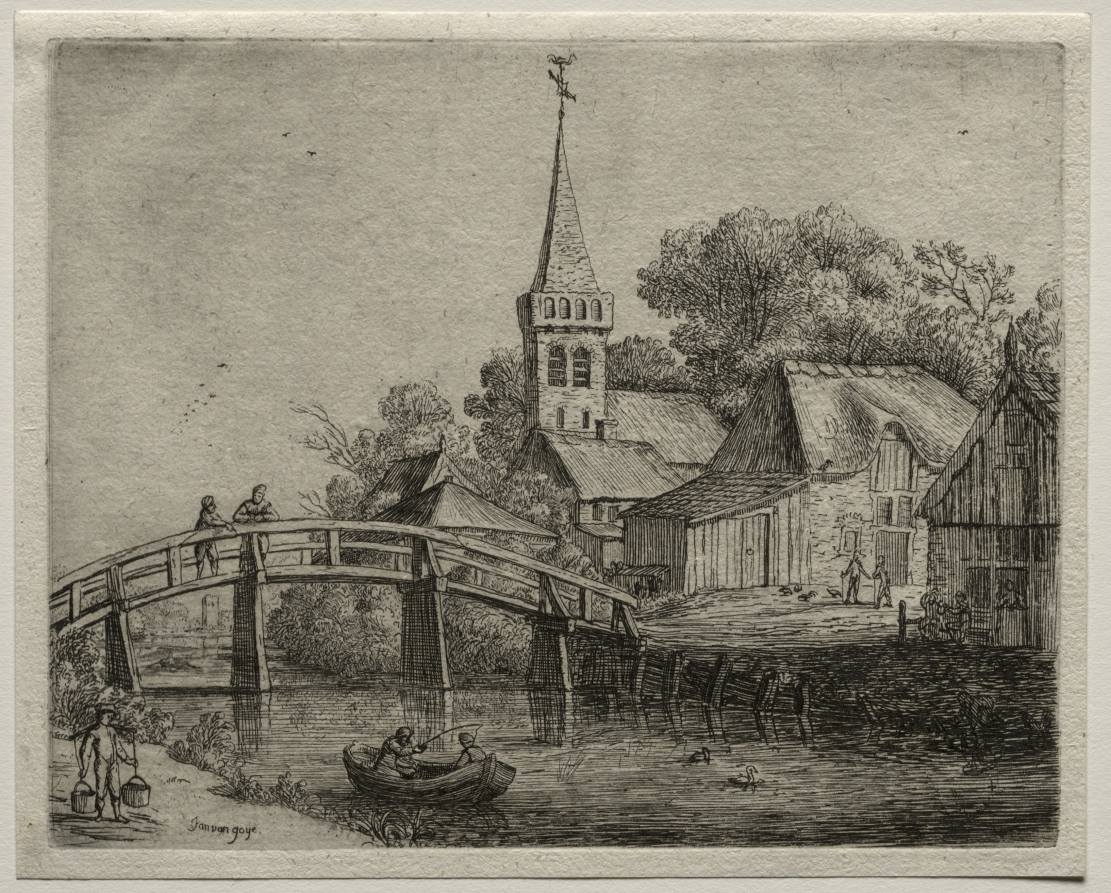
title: The Wooden Bridge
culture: Netherlands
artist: Jan van Goyen (Dutch, 1596–1656)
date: c. 1650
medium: etching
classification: Print